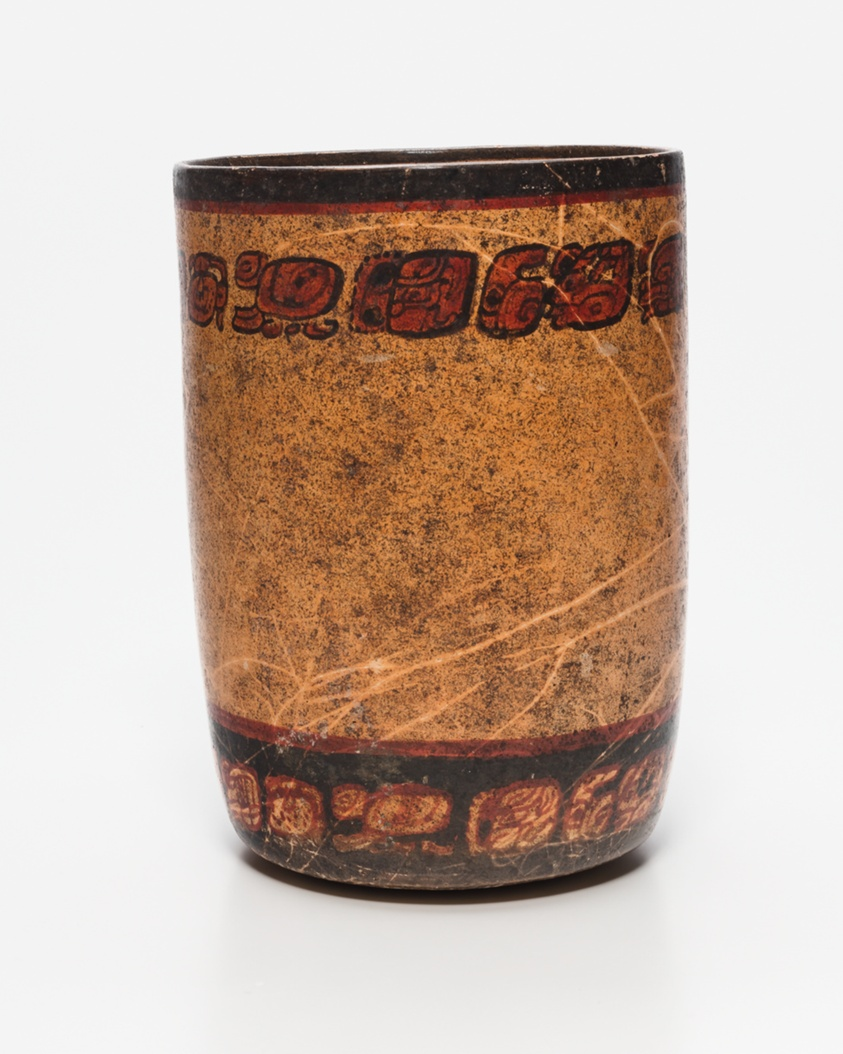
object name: Vessel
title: Cylindrical Vessel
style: maya, mayan, americas, Arts of the Americas, mesoamerican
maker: Maya (Mexico or Guatemala)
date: 250–900 CE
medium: Ceramic and pigment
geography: Mexico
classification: earthenware; art of the americas; ceramics; vessel